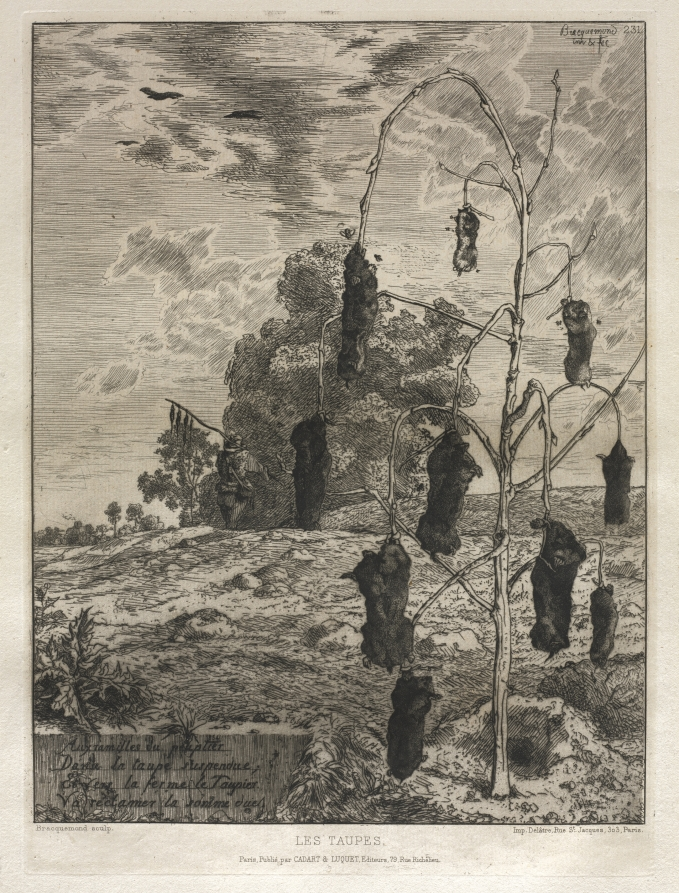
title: Moles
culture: France, 19th century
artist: Félix Bracquemond (French, 1833–1914)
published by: Cadart & Luquet, 79 , rue Richelieu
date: 1854, printed 1866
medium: etching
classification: Print